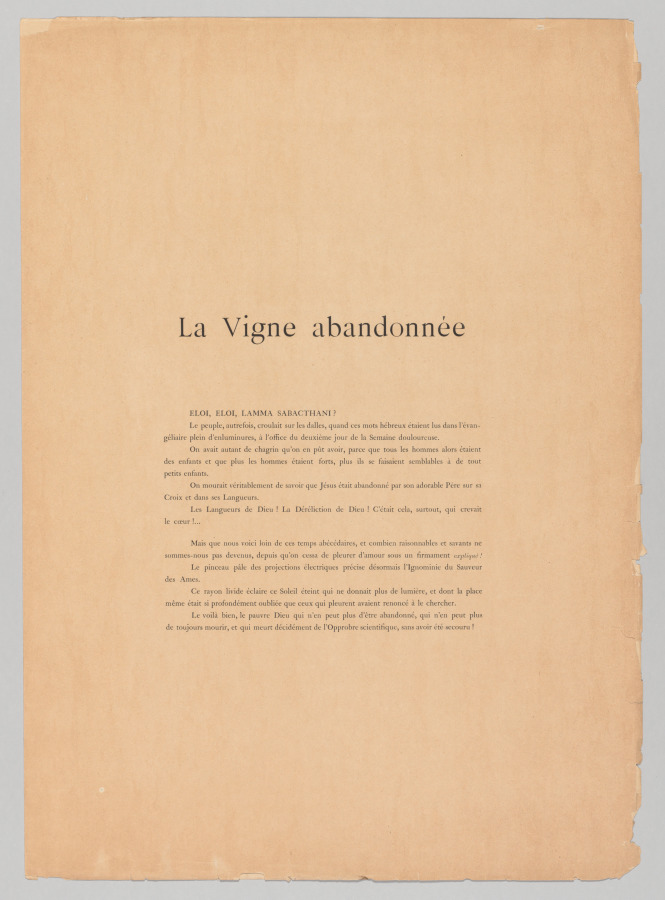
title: The Vintages: The Vintages!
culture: Belgium, 19th century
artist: Henri de Groux (Belgian, 1867–1930)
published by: L'Estampe Originale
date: 1894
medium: letterpress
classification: Print